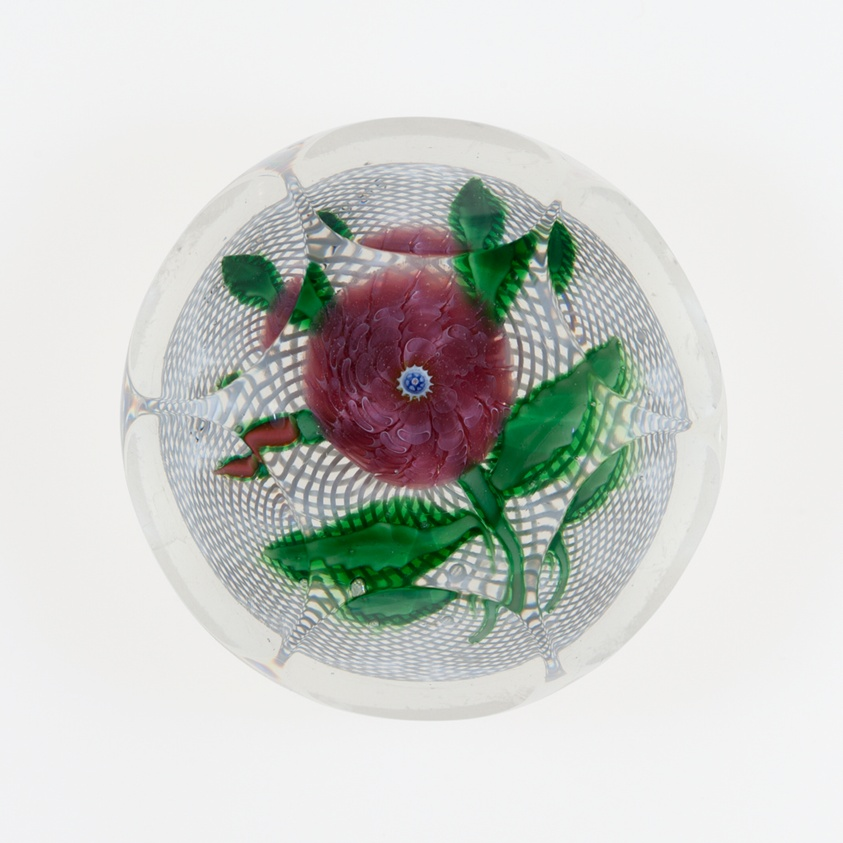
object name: Glass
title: Paperweight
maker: Saint-Louis Glassworks (Cristalleries de Saint-Louis); Lorraine, France, founded 1586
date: c. 1848–55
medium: Glass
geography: Saint-Louis-lès-Bitche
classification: paperweight; lampwork; european decorative arts; glass